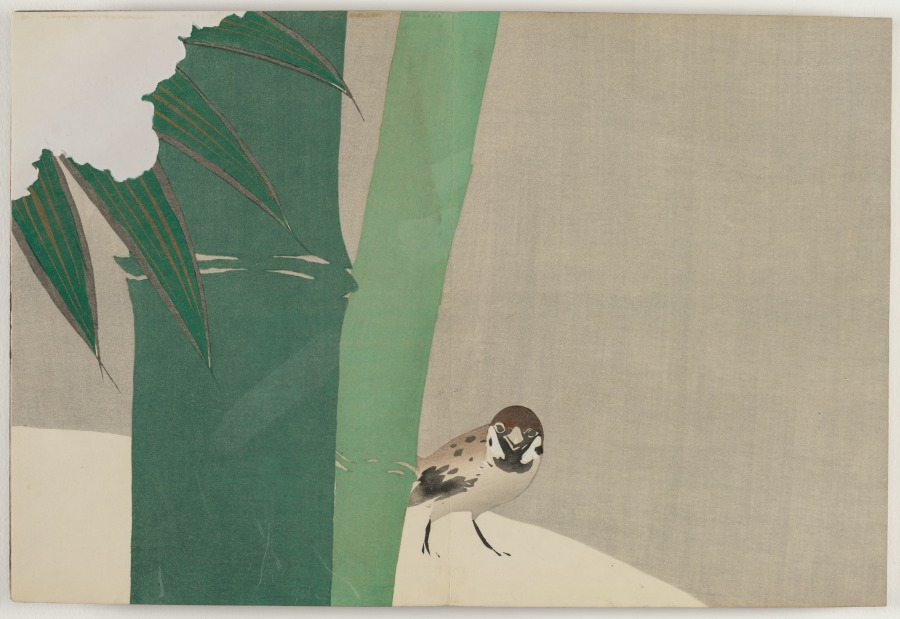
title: Flowers of a Hundred Worlds (Momoyogusa): Bamboo in Snow (Secchuchiku)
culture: Japan, Meiji period (1868–1912)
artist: Kamisaka Sekka (Japanese, 1866–1942)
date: 1909–10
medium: color woodcuts with gold and silver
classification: Bound Volume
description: This print from a set of three woodblock printed albums displays the graphic design prowess of Kamisaka Sekka. The images were first distributed one by one to subscribers to the series but later were reissued in bound form, like this book, for mass consumers. Each print features a vignette taken from nature or Japanese literature. Many of the scenes have a long history in Japan, originating in the 900s or 1000s and having been interpreted by all manner of artists since that time. Sekka’s selections hew closely to precedents from the Rinpa style originated by painter Tawaraya Sōtatsu (c. 1570–c. 1640) and calligrapher Hon’ami Kōetsu (1558–1637).